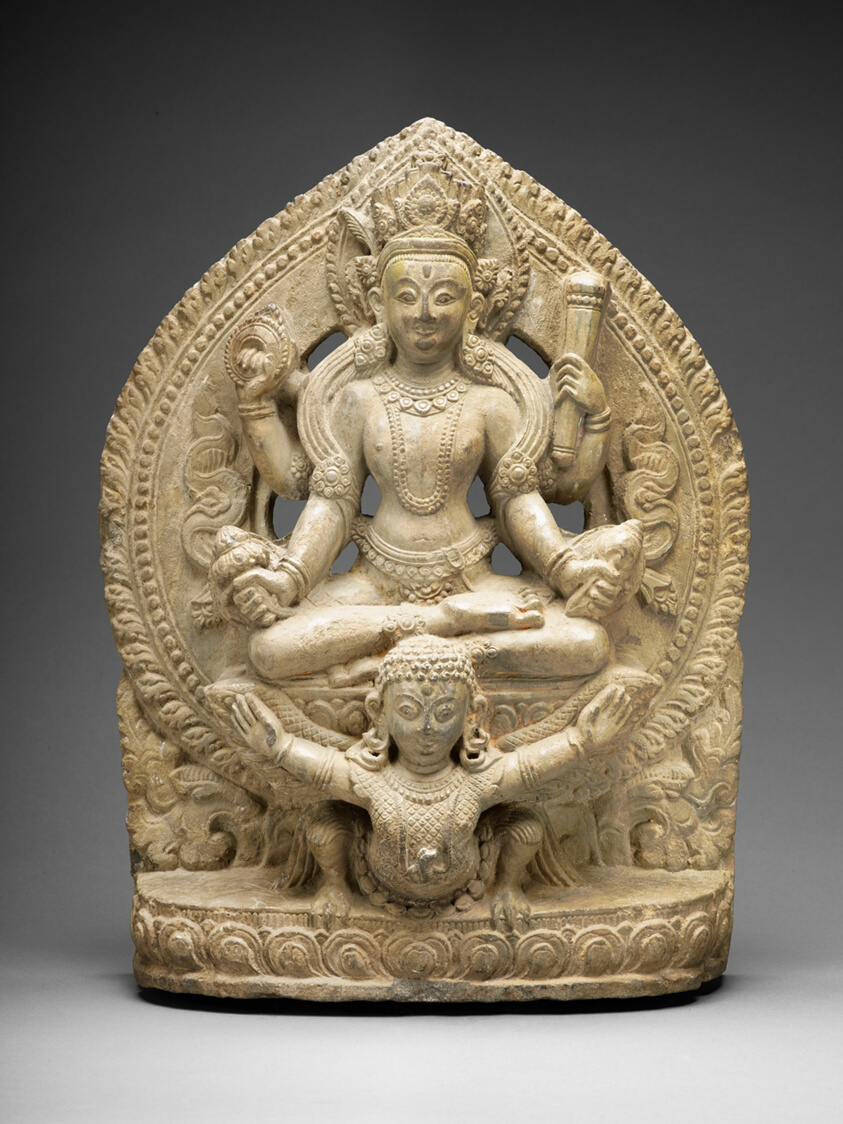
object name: Sculpture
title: God Vishnu Riding His Mount, Garuda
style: Himalayan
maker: Nepal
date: 16th/17th century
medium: Schist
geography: Nepal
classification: sculpture; stone (unidentified); stone; asian art